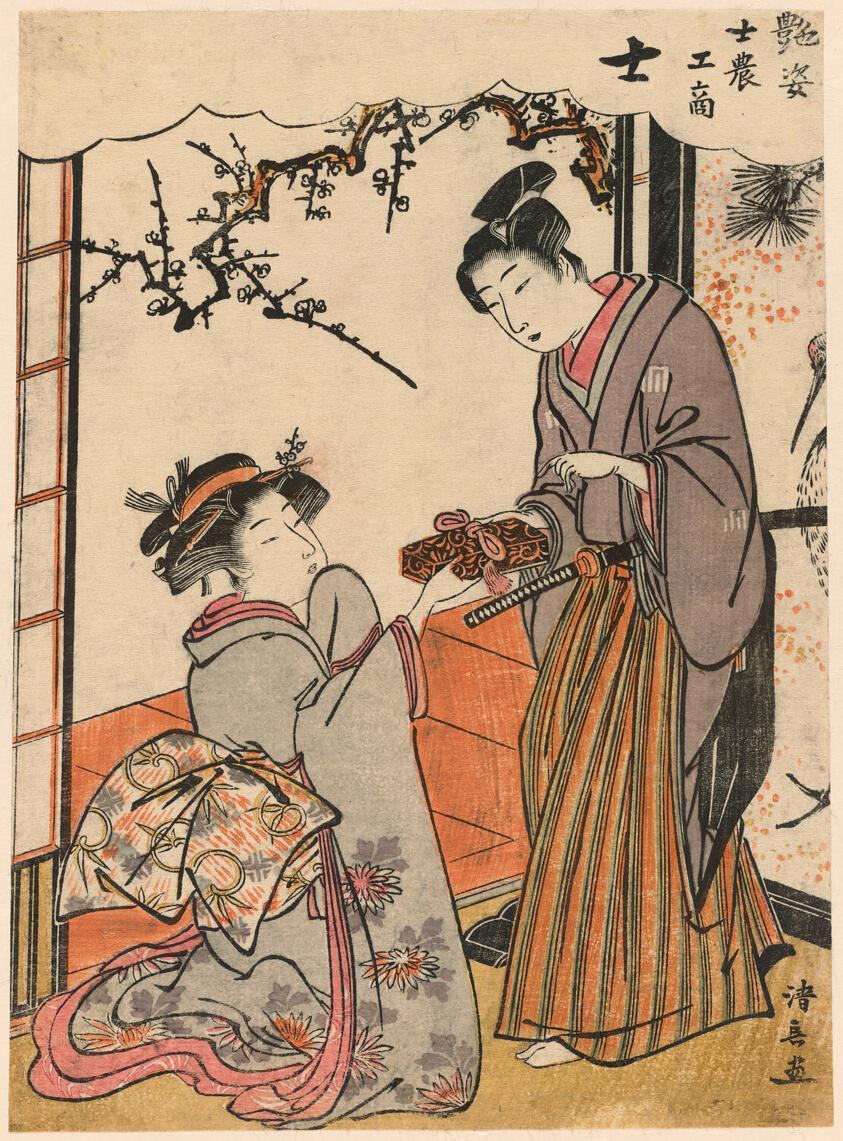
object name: Print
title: The Samurai (Shi) from the series Beauties Illustrating the Four Social Classes (Adesugata shi no ko sho)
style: Japanese (culture or style)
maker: Torii Kiyonaga (Japanese, 1752-1815)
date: c. 1779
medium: Color woodblock print; koban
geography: Japan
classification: woodblock print; print; asian art